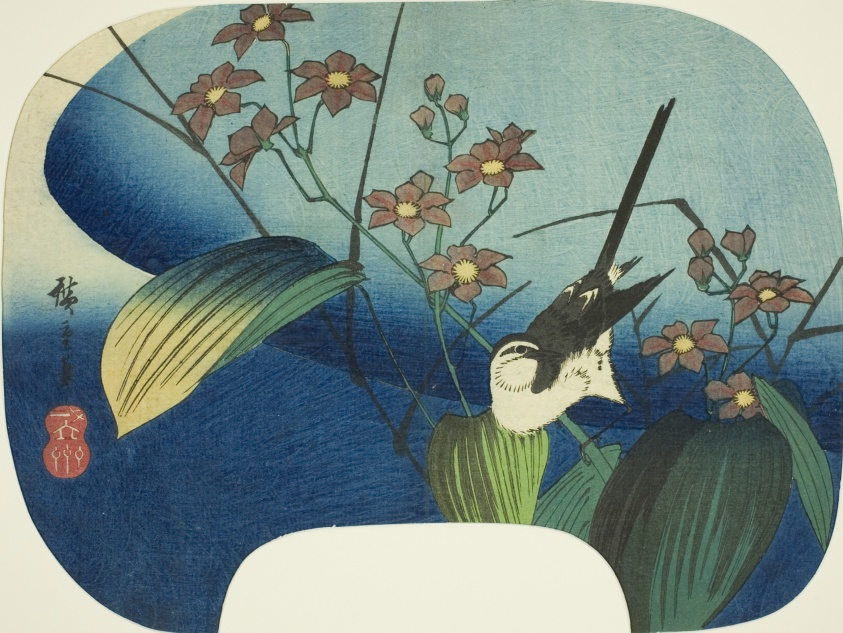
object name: Print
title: Wagtail and monochoria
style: Japanese (culture or style)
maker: Utagawa Hiroshige 歌川 広重; Japanese, 1797-1858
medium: Color woodblock print; uchiwa-e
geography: Japan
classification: woodblock print; print; asian art